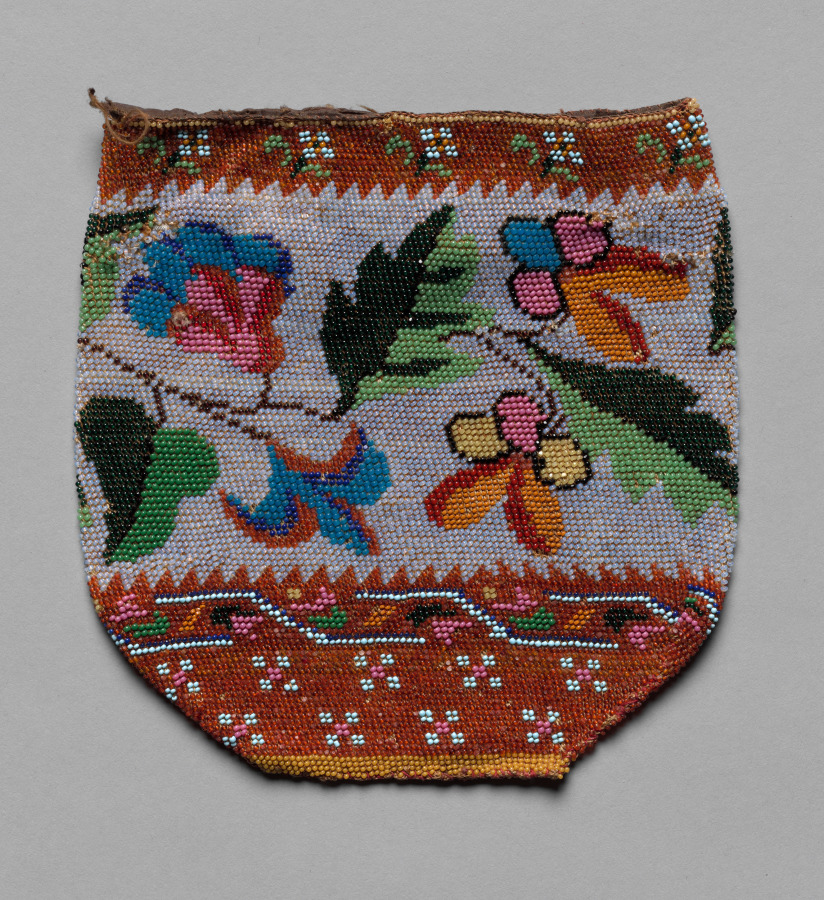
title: Beaded Bag (floral motif)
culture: America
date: 19th century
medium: glass beads, silk? lining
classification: Garment